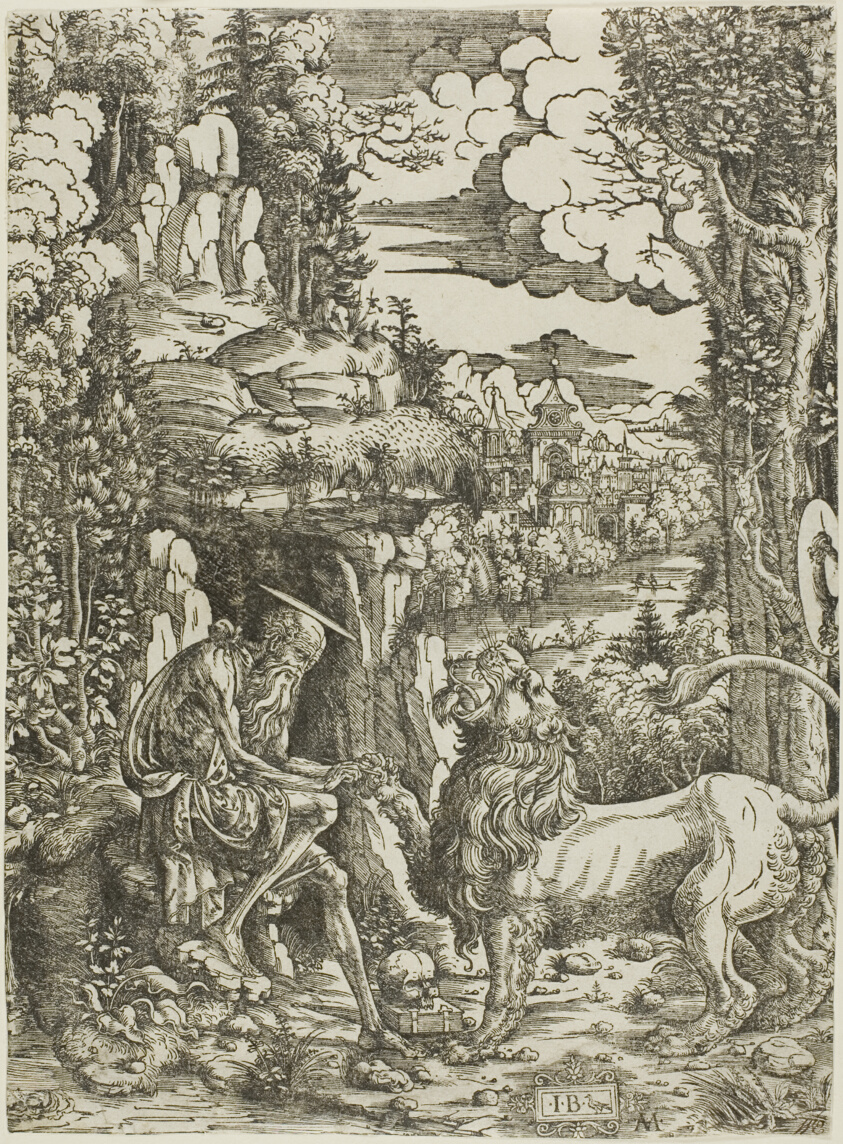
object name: Print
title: Saint Jerome and the Lion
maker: Master I.B. with the Bird (Giovanni Battista Palumba); Italian, active c. 1500-1525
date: c. 1509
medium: Woodcut in black on paper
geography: Italy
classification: woodcut; print; prints and drawing